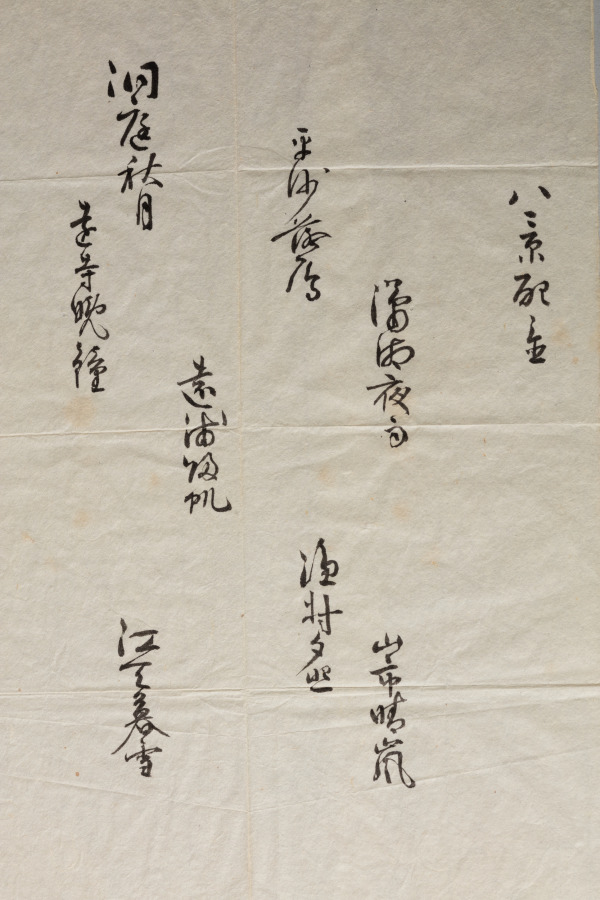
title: Landscape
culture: Japan, Edo period (1615–1868)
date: early 1600s to mid-1800s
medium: hanging scroll; ink on paper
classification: Painting